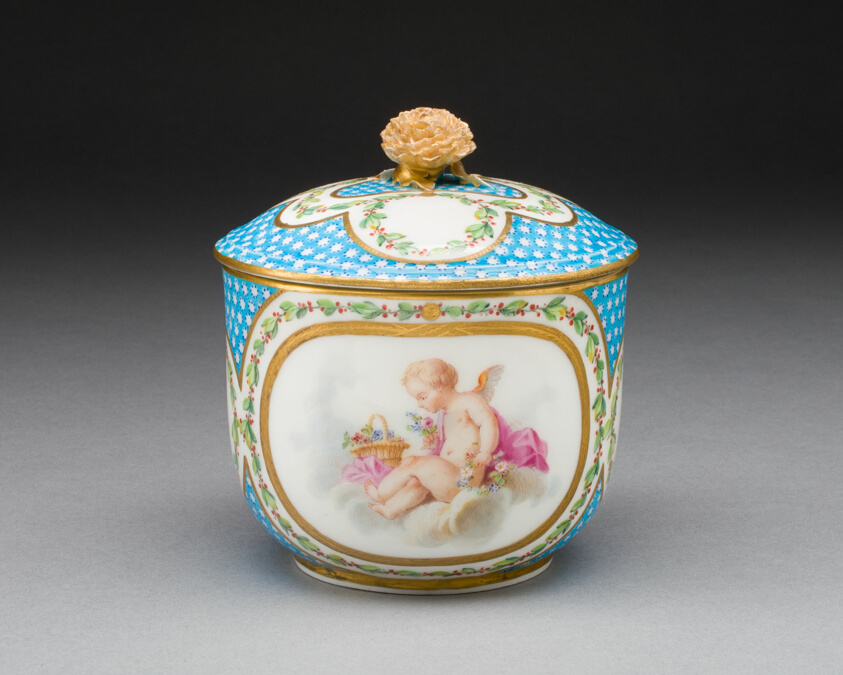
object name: Ceramics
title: Sugar Bowl (from a tea service)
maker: Sèvres Porcelain Manufactory; French, founded 1740; Figures after François Boucher (French, 1703-1770); Painted by Jacques Fontaine (French, 1734/35-1807, active 1752-1800)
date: 1770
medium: Soft-paste porcelain, polychrome enamels, and gilding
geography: Sèvres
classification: sugar bowl; teaware; porcelain; european decorative arts; ceramics